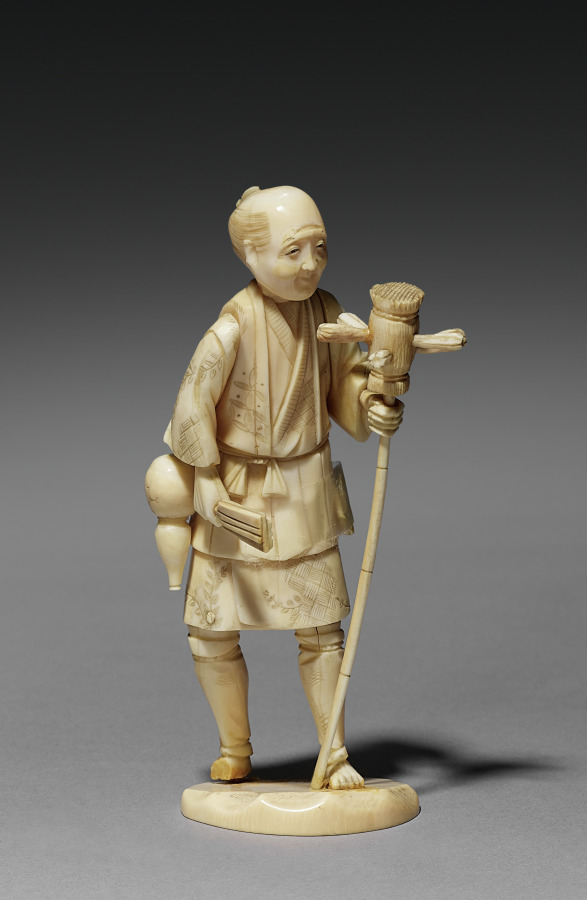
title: Man Holding a Standard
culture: Japan, Meiji period (1868–1912)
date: late 1800s-early 1900s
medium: ivory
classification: Ivory